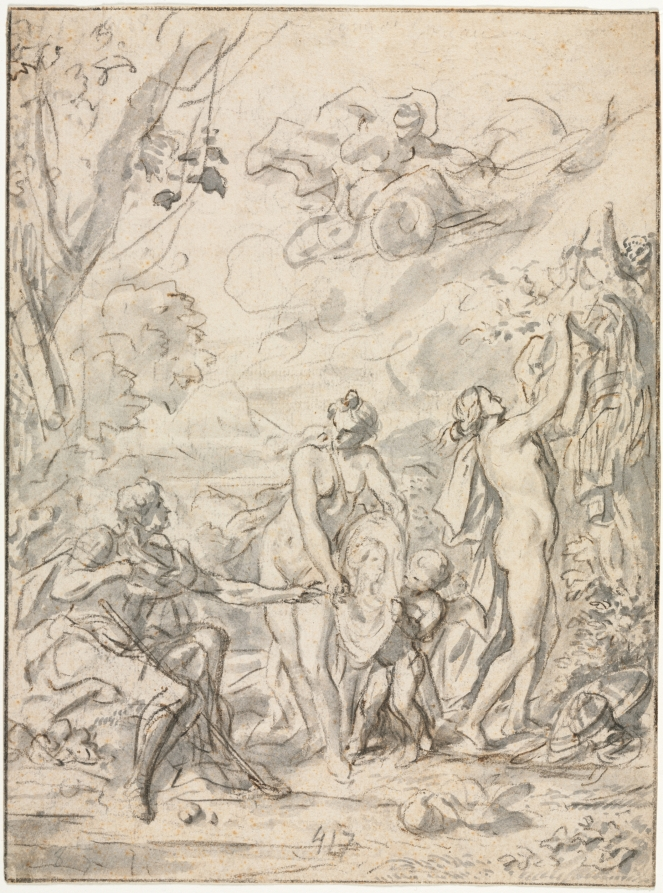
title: The Judgment of Paris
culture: France, 18th century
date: c. 1740–1750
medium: black chalk and brush and gray wash; framing lines in black chalk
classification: Drawing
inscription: lower left, in graphite?: 8 ; lower center, in graphite: 417 ; VERSO, upper left, in graphite: 30 L [or f?] ; lower left, in graphite: Seb. Bourbon f. ; lower left, in graphite: [F Boucher ?] [crossed out and partially erased] ; lower right, in graphite: 3184